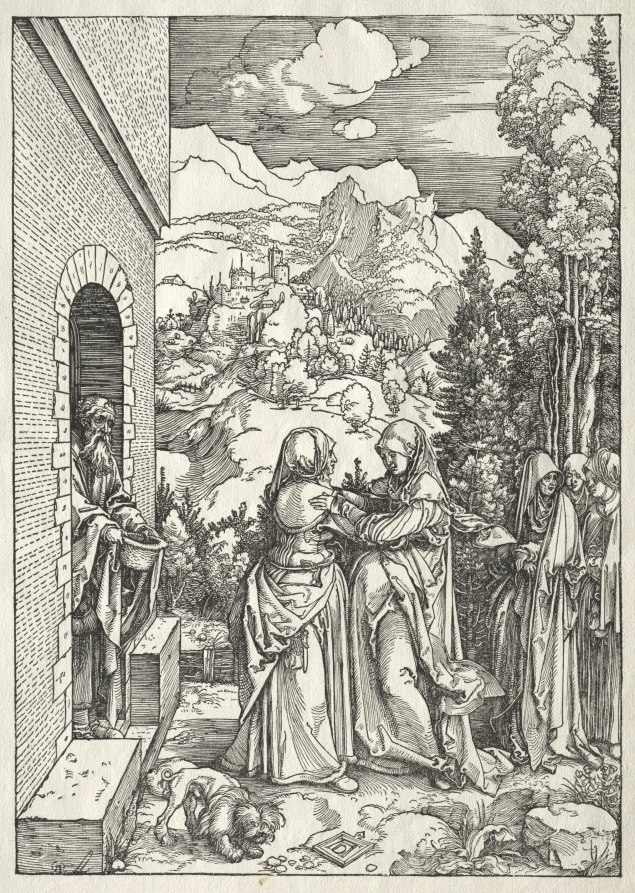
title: Life of the Virgin: The Visitation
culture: Germany, early 16th Century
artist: Albrecht Dürer (German, 1471–1528)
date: 1504–1505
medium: woodcut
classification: Print